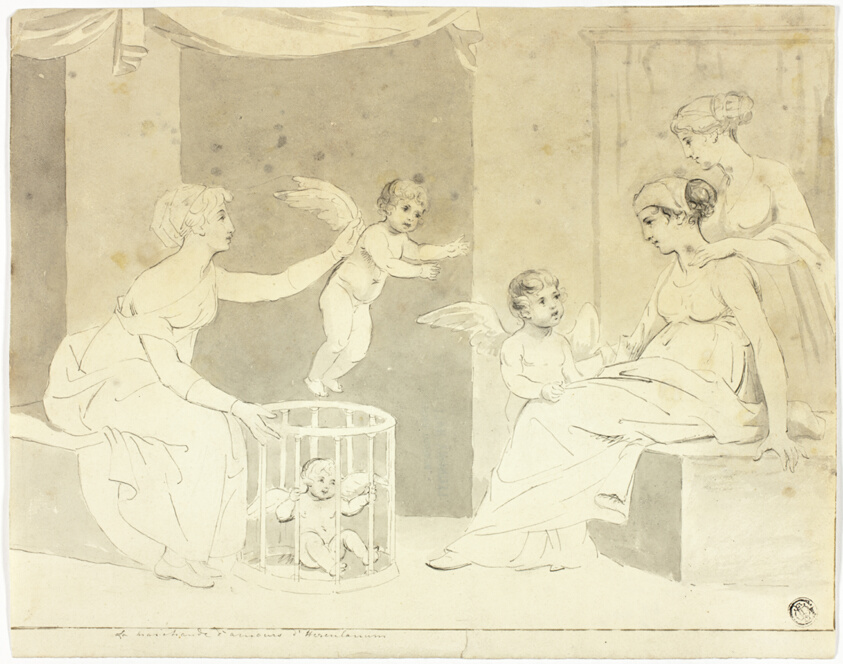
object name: Drawing and Watercolor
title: Seller of Loves (after Herculancum frieze)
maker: John Downman (English, 1750-1824)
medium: Pen and black ink, with brush and gray wash, on ivory wove paper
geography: England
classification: pen and ink drawings; drawings (visual works); prints and drawing